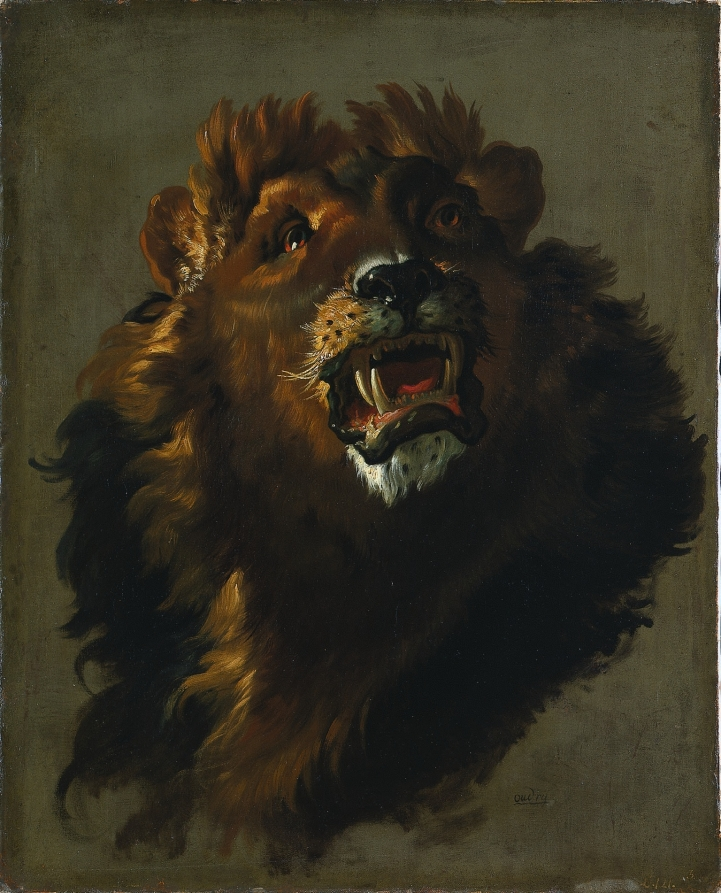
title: Lion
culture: France, 18th century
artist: Giuseppe Baldrighi (Italian, 1723–1803)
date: 1750s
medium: oil on canvas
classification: Painting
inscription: signed lower right: Oudry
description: Looking upward with eyes gleaming and mouth open, the lion conveys wild elegance. The sketch comprises short brushstrokes, and its most striking detail is the thick and plentiful mane. Undefined planes of black make up the lion's longest tresses, but closer to the face, the mane becomes increasingly light. Although the darkest parts of the mane lack precise definition, the chestnut shades of the mane host shadows and highlights that lend a sense of realism. Additionally, varied shades of brown are contrasted by the lighter, creamier shades of white at the lion's muzzle. The lifelike nature of this sketch is further communicated by the bright, wet patches on the lion's nose and mouth. Likewise, a bright glimmer in the lion's right eye illustrates its vitality. At the bottom right of the lion, a small signature attributes the painting to the French animal painter Jean-Baptiste Oudry, although this signature was a later addition. This is actually the work of the Italian painter Giuseppe Baldrighi, court artist to the Dukes of Parma. Sent to Paris in 1752, Baldrighi studied with a number of leading French painters, including Oudry, leading to a number of animal studies in Oudry's style. These works emulate the elder artist's smooth handling and stem directly from Oudry's method of executing head studies of animals in expressive poses. This work has a much blunter facture, a more linear use of paint, and a lack of psychological depth in the animal's expression—all characteristic of Baldrighi.